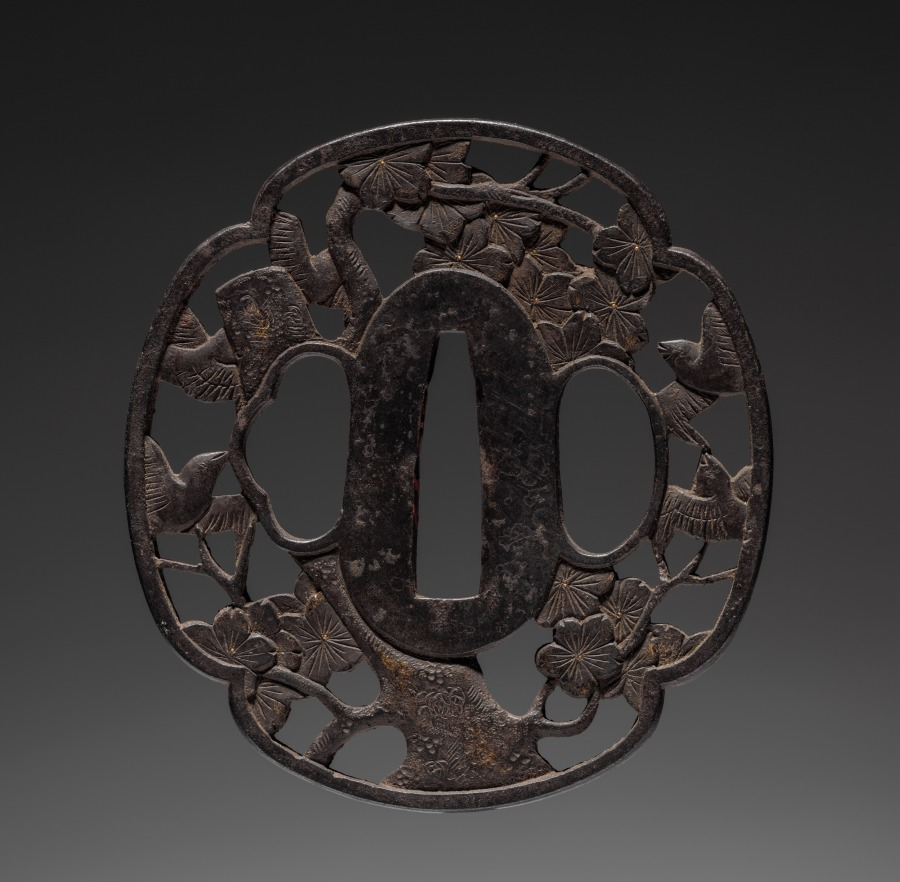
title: Sword Guard (Tsuba) with Birds in Cherry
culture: Japan, possibly Edo period (1615-1868)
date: c. 1615–1868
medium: iron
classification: Arms and Armor